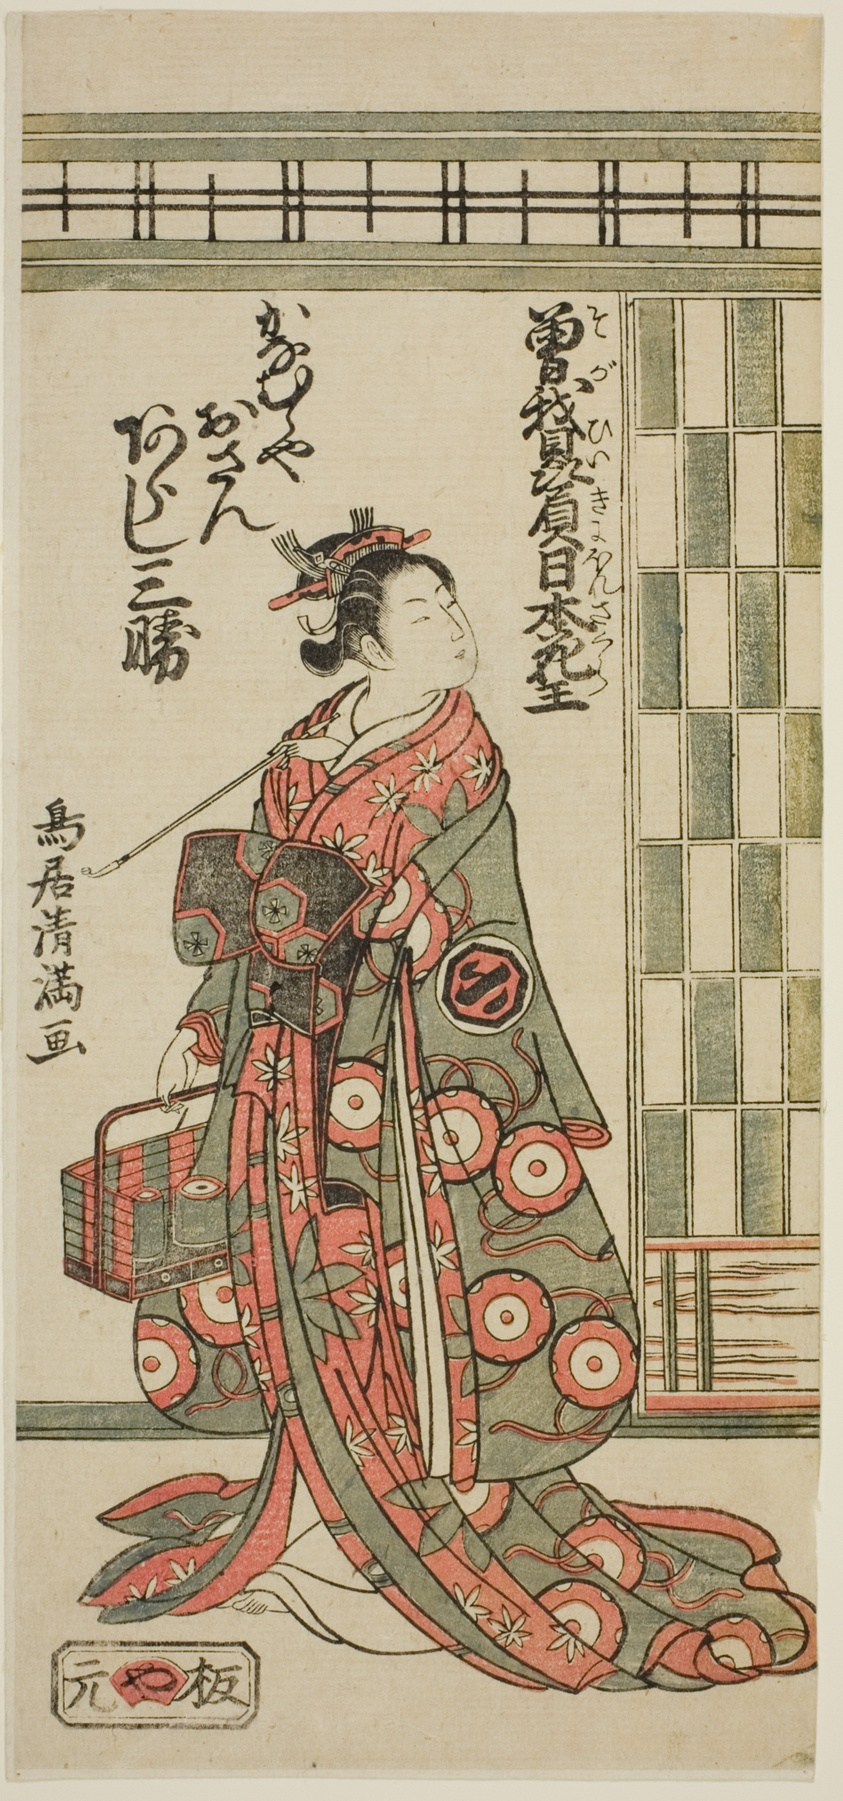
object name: Print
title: The Actor Arashi Sankatsu as Kanamuraya Osan in the play "Soga Hiiki Nihon Sakura," performed at the Nakamura Theater in the third month, 1762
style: Japanese (culture or style)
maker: Torii Kiyomitsu I (Japanese, 1735–1785)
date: 1762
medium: Color woodblock print; hosoban, benizuri-e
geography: Japan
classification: woodblock print; print; asian art